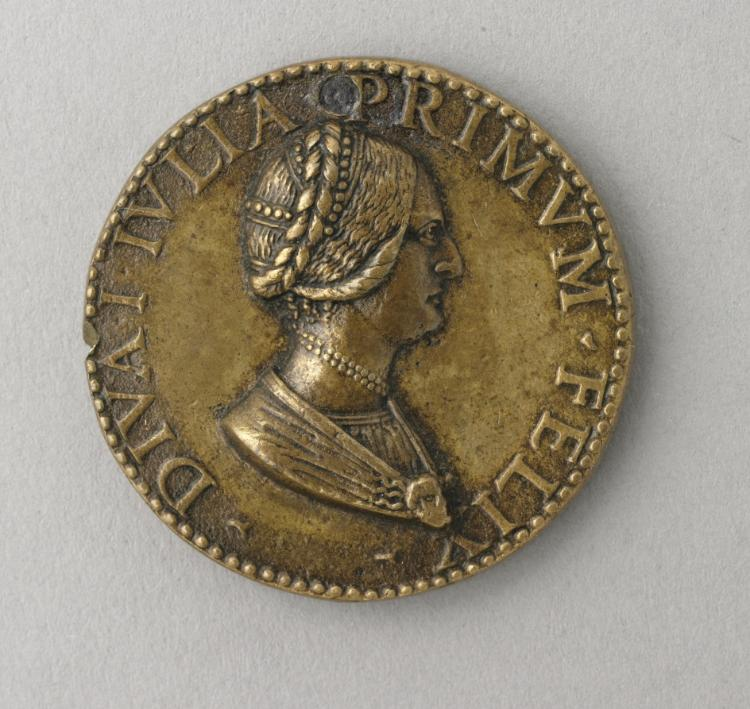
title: Diva Julia (obverse)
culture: Italy, 16th century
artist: Antico (Italian, c. 1460–1528)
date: c. 1490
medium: bronze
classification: Sculpture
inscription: DIVAI IVLAI PRIMVM FELIX.